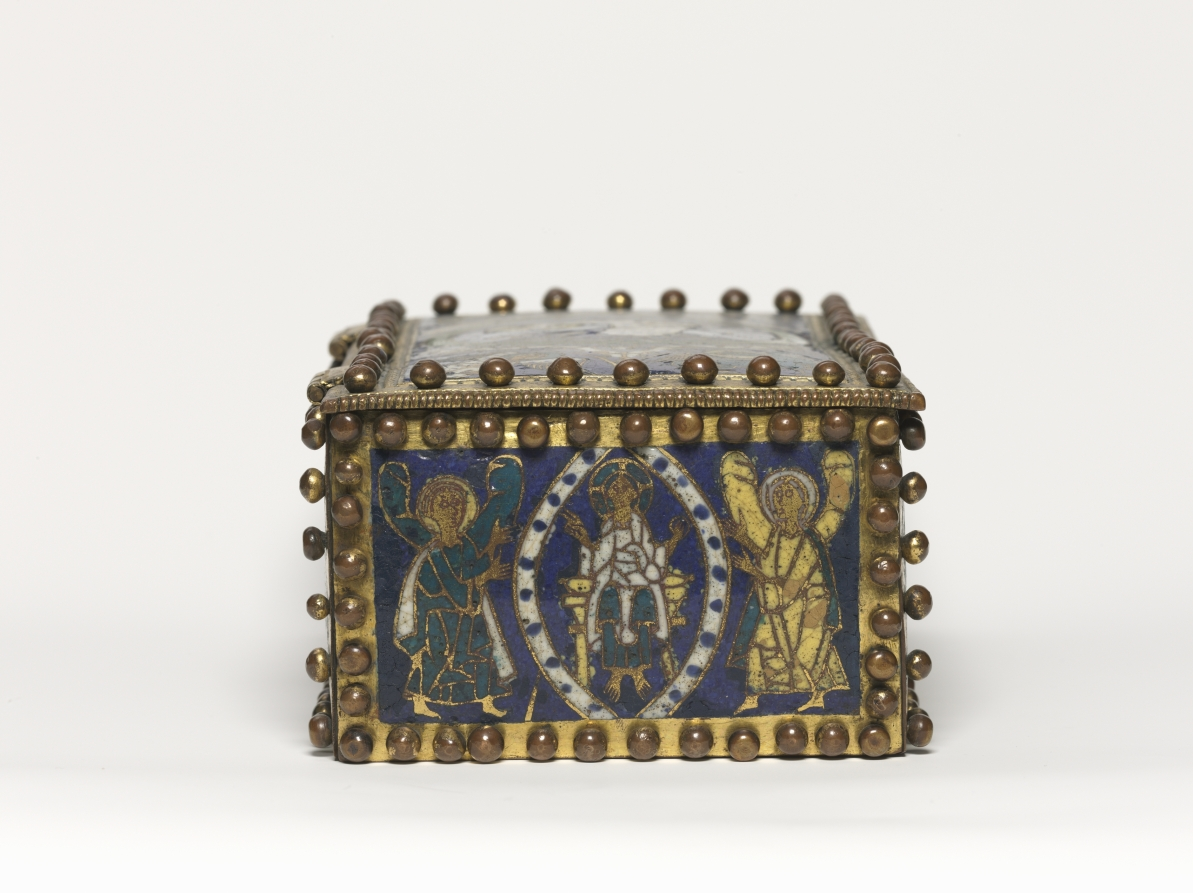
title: Casket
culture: Northern Germany?, Romanesque period, 12th century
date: 1100–1150?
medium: gilded copper, champlevé enamel, wood core (modern)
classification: Enamel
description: This champlevé enamel casket belongs to a distinct group of nine closely related objects characterized by the vivid colors of their enamel decoration and rows of spherical pins placed along the edges of each enamel plaque. Recent X-ray analysis suggests that the casket originally functioned as a stand for an altar cross. Such a function is attested to in at least three related caskets (in Copenhagen, Hildesheim, and Berlin). The casket’s iconographic program features the 12 apostles, placed under arcades (on the long sides), the Crucifixion and Christ in Majesty (on the short sides), and the Lamb of God surrounded by the symbols of the four Evangelists (on the lid).